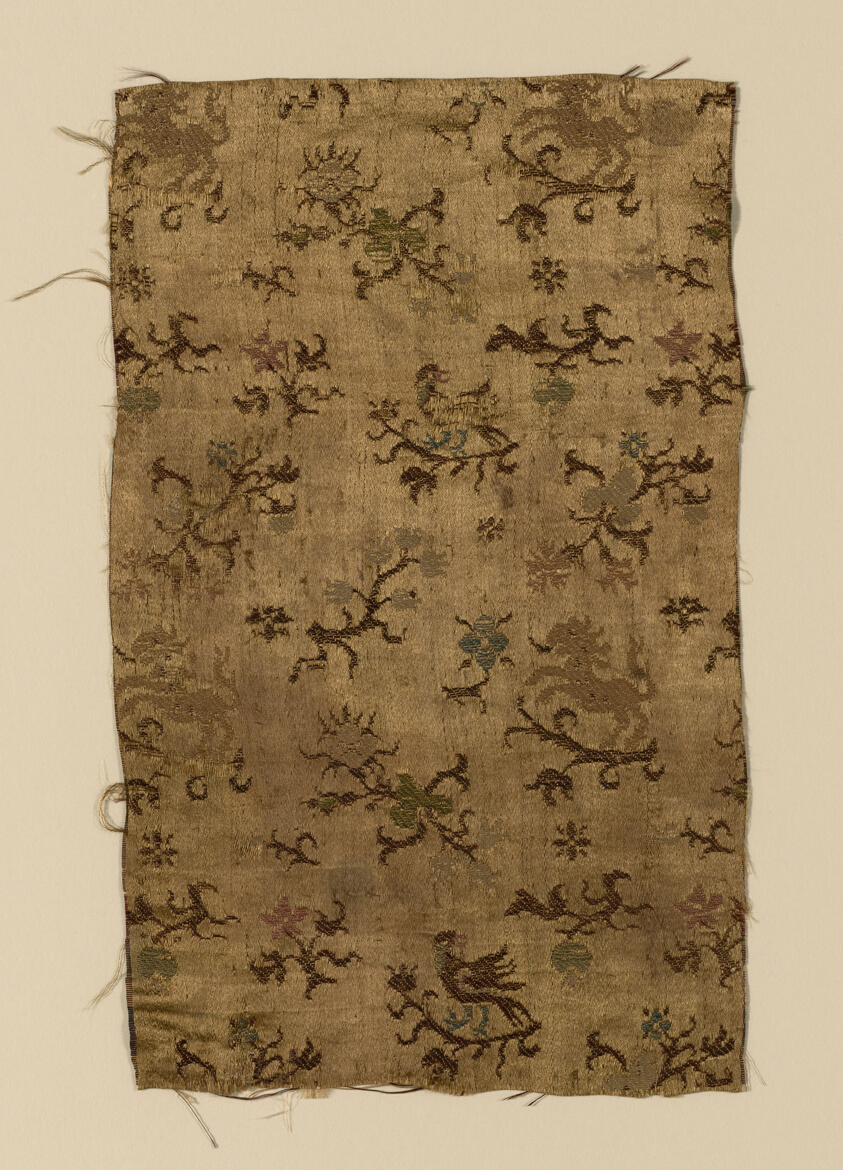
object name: Textile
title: Fragment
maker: Italy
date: 1650/1700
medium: silk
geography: Italy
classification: textile; weaving